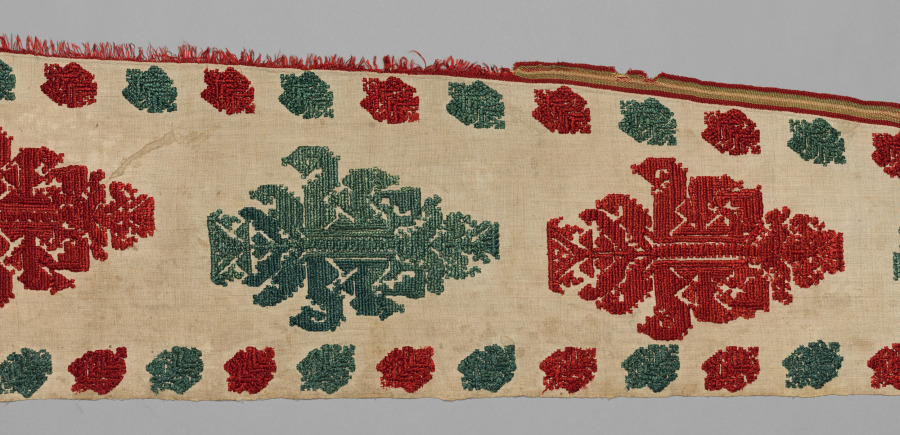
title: Portion of a Bed Tent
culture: Greece, Dodecanese Islands, Rhodes, 18th century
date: 1700s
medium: embroidery: silk on linen tabby ground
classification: Embroidery